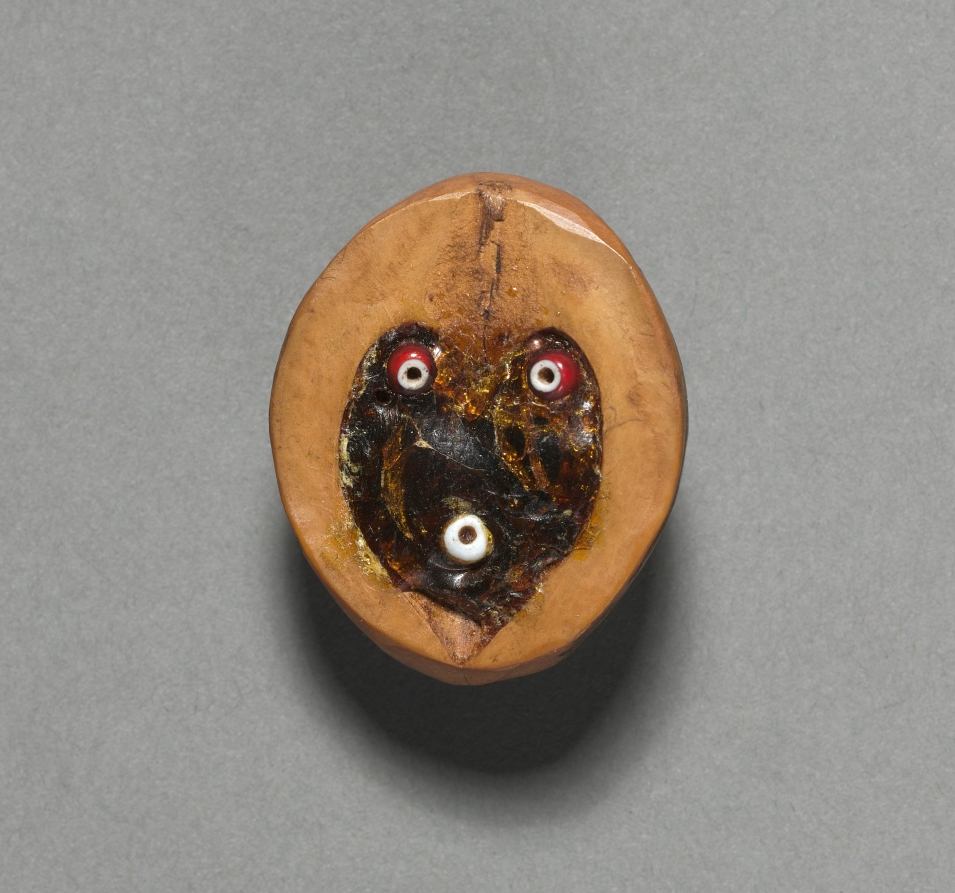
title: Gambling Dice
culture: California, Tulare, Unassigned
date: before 1917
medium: hollow shell, resin, glass beads, mica/seashell fragment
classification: Implements